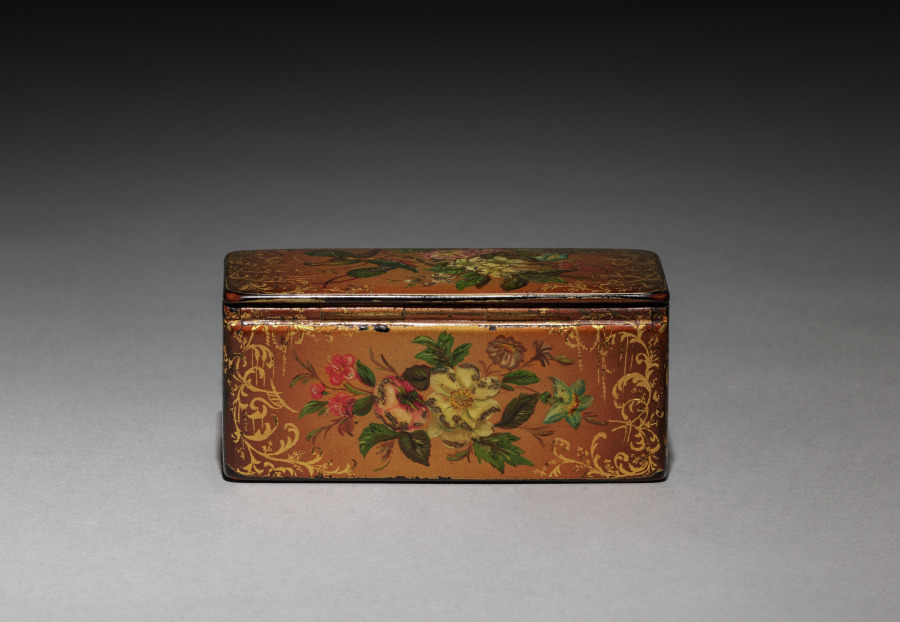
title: Box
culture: Russia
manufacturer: Lukutin Factory (Russian, 1818–1904)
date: 1830–81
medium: lacquered wood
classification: Miscellaneous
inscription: inscription on interior.